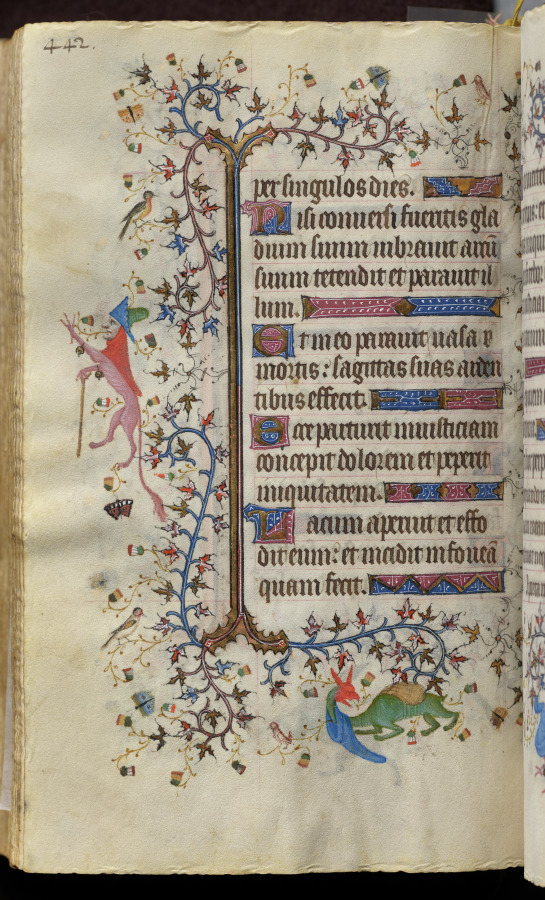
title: Hours of Charles the Noble, King of Navarre (1361-1425): fol. 215v, Text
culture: France, Paris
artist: Master of the Brussels Initials and Associates (French)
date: c. 1405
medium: ink, tempera, and gold on vellum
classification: Bound Volume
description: This precious volume was obviously highly prized by its owner, the French-born King of Navarre, who had his coat of arms painted on no less than twenty folios. Rather than directly commissioning this manuscript from a specific workshop, it seems that Charles the Noble acquired his book of hours -- perhaps ready-made for the luxury market -- while on a trip to Paris in 1404-05. A collaborative effort, six painting styles are evidenced within the pages of this codex, those of two Italians, two Frenchmen, and two Netherlanders. The painter who was responsible for the planning and decoration of the book, and who produced seventeen of the large miniatures, was a Bolognese artist known as the Master of the Brussels Initials. His principal assistant, responsible for most of the borders, was a Florentine who signed his name "Zecho" da Firenze on folio 208 verso.